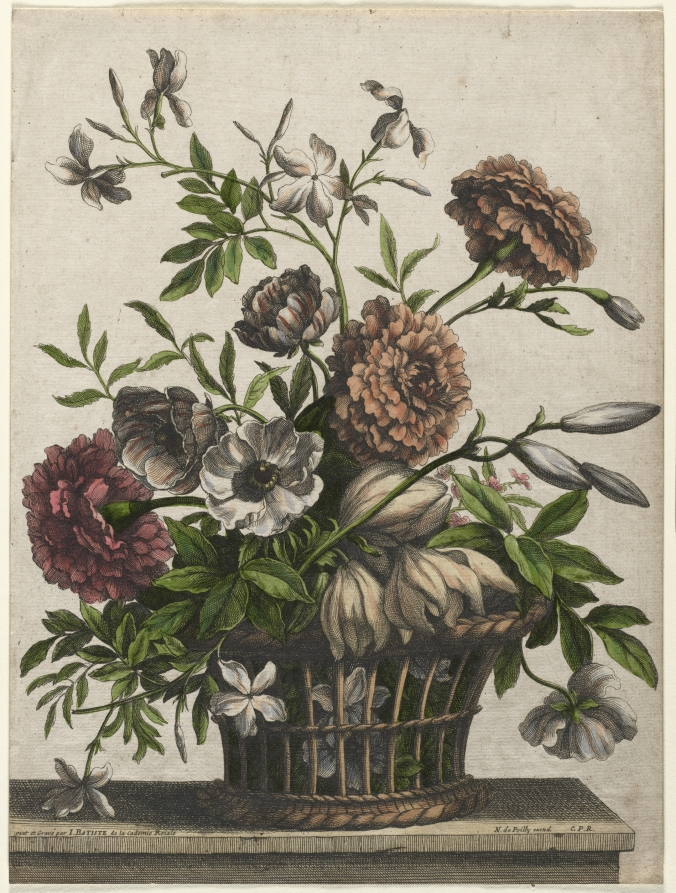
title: Marigolds, single Anemone, Jasmine...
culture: France, 17th century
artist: Jean-Baptiste I Monnoyer (French, c. 1636–1699)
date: c. 1680–95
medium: etching and engraving, hand colored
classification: Print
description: In 1939 the Print Club of Cleveland established a memorial collection for Donald Gray, president of the Club 1933–34. Since Mr. Gray was a landscape architect and author of the “Daily Garden” column for The Cleveland Press, a now defunct newspaper, the choice of 15 prints and one drawing of flower and fruit subjects was an appropriate tribute. These were the first botanical prints to enter the collection, which has grown to a large representation of more than 100 prints and related drawings.